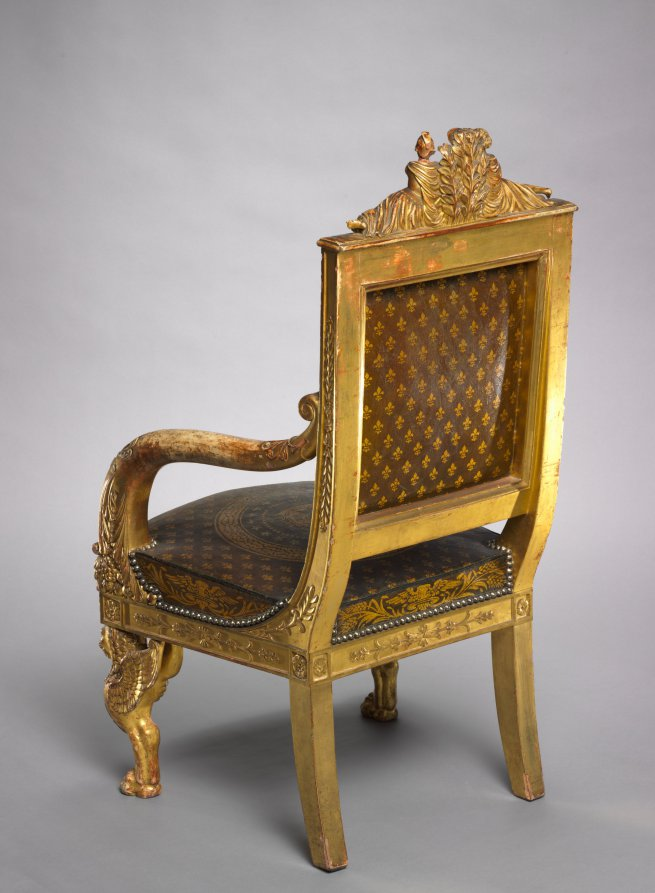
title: Child's Throne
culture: France, Paris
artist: Pierre-Marie Balny le Jeune (French, 1832)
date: 1822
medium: carved and gilded wood, leather upholstery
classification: Furniture and woodwork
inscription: inscribed with stencils inside back rail: BLONDEL TAPISSIER/RUE ST. ANTOINE N 72 1822 inscribed in ink lower edge back rail: 12 JANVIER 18[22?]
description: This chair was made for the young, presumed successor to the French throne who ruled briefly as Henri V in 1830, the last of the direct Bourbon line. He is depicted at the center of the top rail protected by female figures representing France and Minerva, the Roman goddess of wisdom. Fleurs-de-lis and the Gallic rooster, symbols of French royalty and the French people, decorate the upholstery.